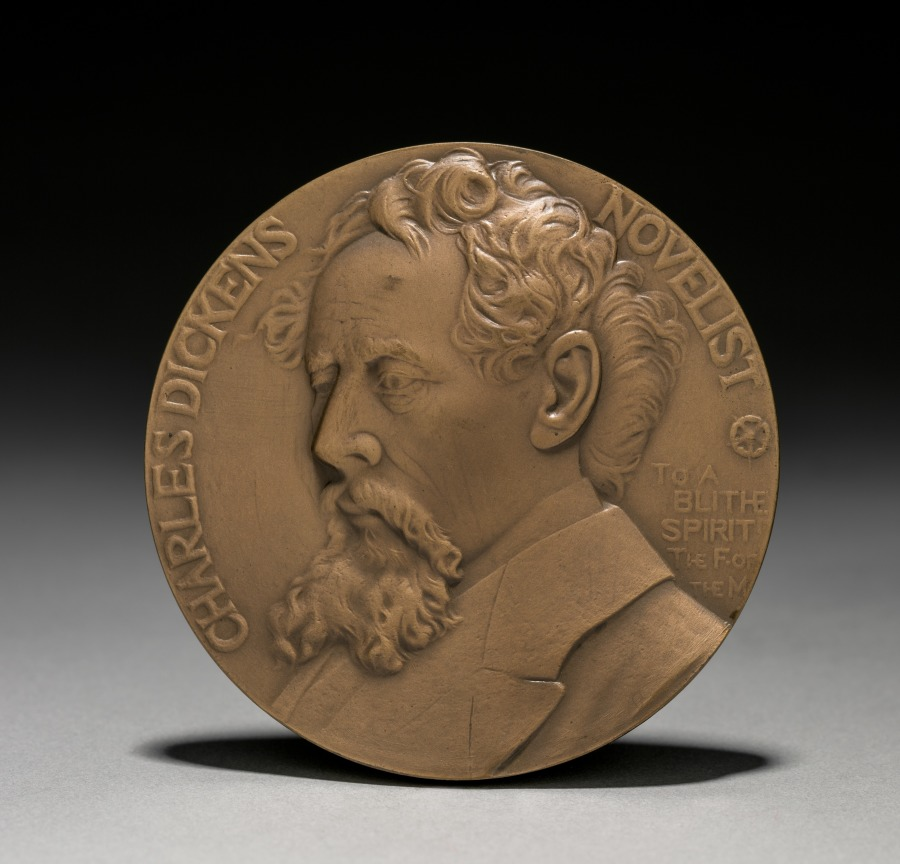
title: Medal: Charles Dickens (obverse)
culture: America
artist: John Severinus Conway (American, 1852–1925)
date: 1912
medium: bronze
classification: Metalwork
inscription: "CHARLES DICKENS NOVELIST. TO A/BLITHE/SPIRIT/THE F OF/ THE M."